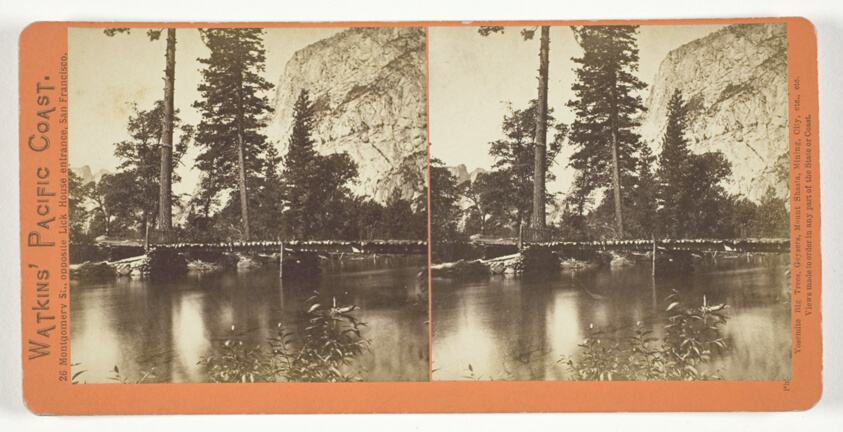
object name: Photograph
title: The Bridge, Yosemite, from the series "Watkins' Pacific Coast"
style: 19th century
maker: Carleton E. Watkins; American, 1829-1916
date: 1861/76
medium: Albumen print, stereo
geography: United States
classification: stereograph (albumen); albumen silver print; photographic process; photography; photograph